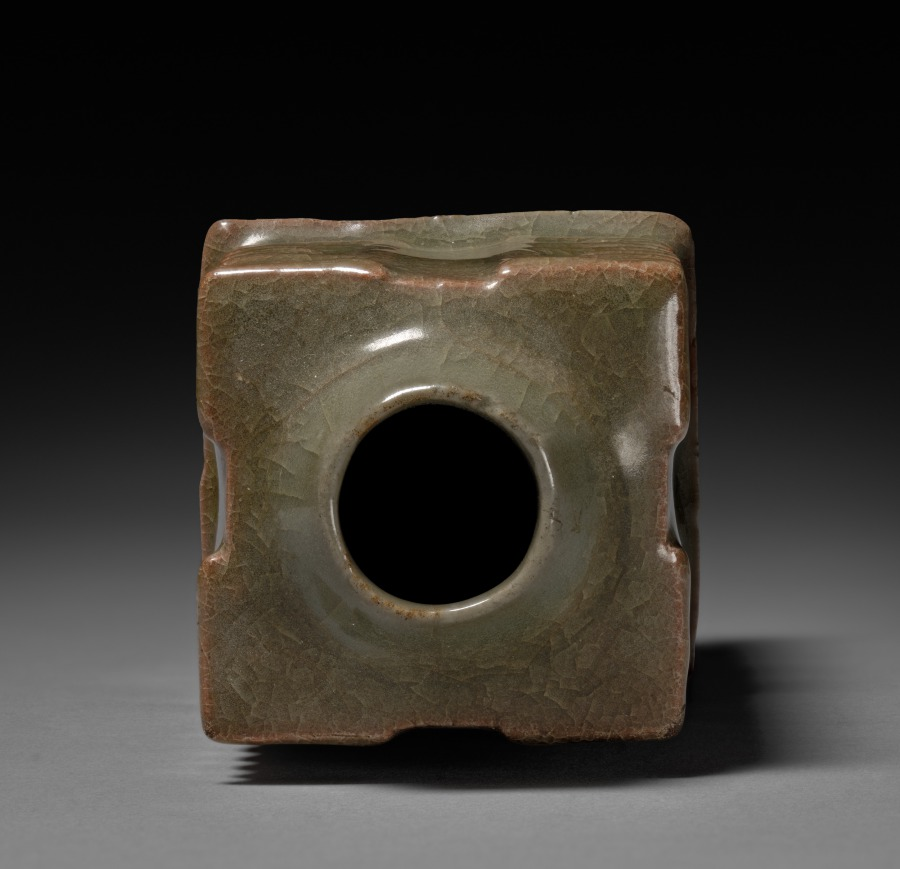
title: Vase in Shape of Cong: Southern Celadon Ware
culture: China, Zhejiang province, Yuan dynasty (1271-1368)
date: 1271–1368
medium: glazed buff stoneware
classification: Ceramic